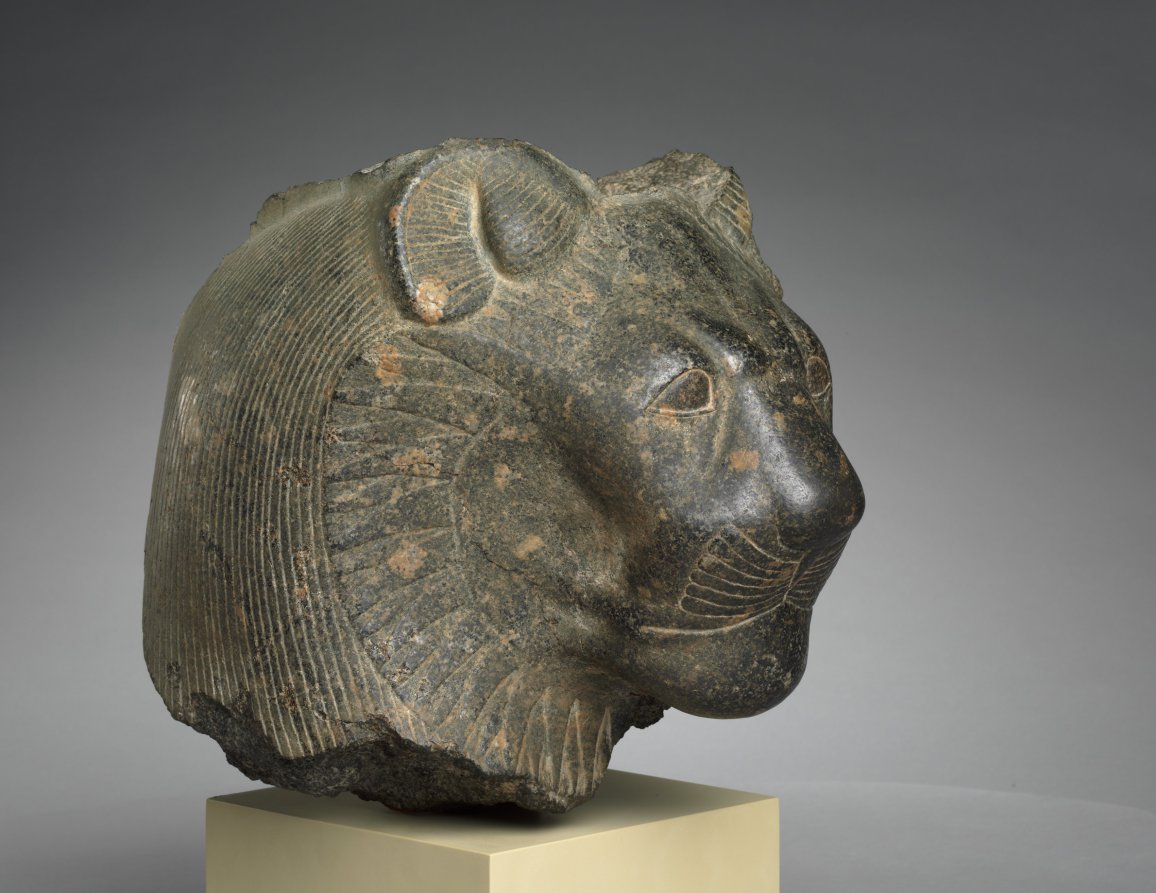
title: Head of Sekhmet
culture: Egypt, Thebes(?), New Kingdom (1540–1069 BCE), Dynasty 18, reign of Amenhotep III (1390–1352 BCE)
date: c. 1391–1353 BCE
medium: granodiorite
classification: Sculpture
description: This lioness head once belonged to a grand statue of the goddess Sekhmet, "the powerful one," probably seated and wearing a tight dress. Possibly appealing to her healing aspect, Pharaoh Amenhotep III, often described as “beloved of Sekhmet,” commissioned and dedicated hundreds of large granodiorite Sekhmet sculptures in his Theban mortuary temple. Thus, this head likely comes from Thebes, perhaps later moved across the Nile—like many such sculptures—to the temple of Mut, a related deity, at Karnak. Behind her stylized ruff, Sekhmet wears a wig, once crowned with a sun disk and uraeus, the stylized cobra symbolizing royal or divine power.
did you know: Amenhotep III may have dedicated 730 statues of Sekhmet, two for each day of the year.